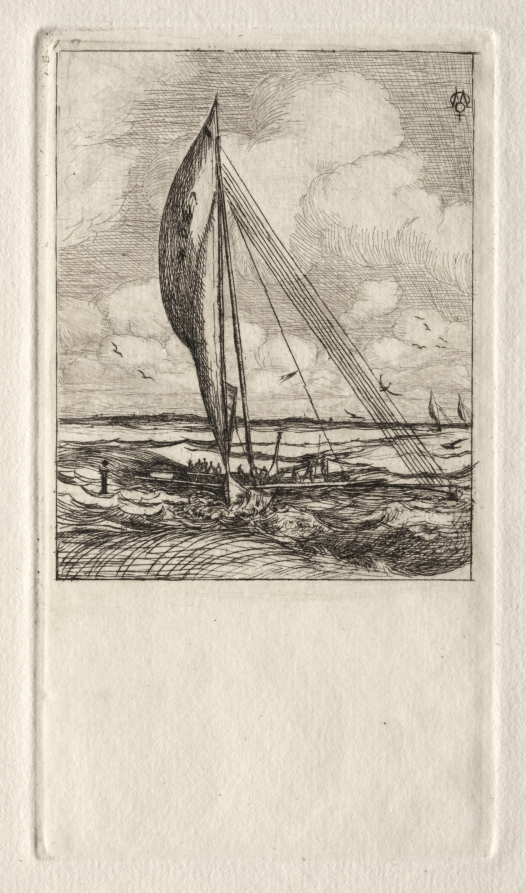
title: Swift Sailing Proa, Mulgrave Archipelago, Oceania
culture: France, 19th century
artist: Charles Meryon (French, 1821–1868)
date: 1866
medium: etching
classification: Print